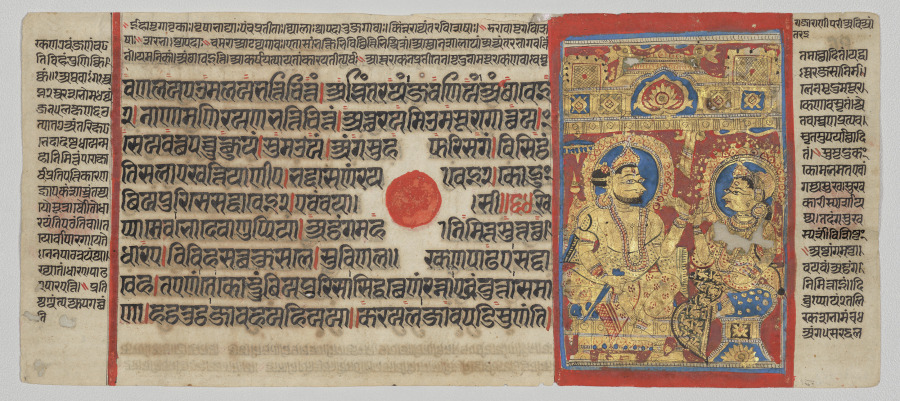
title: King Siddhartha and Queen Trishala Sit Alone to Discuss Her Dreams, Folio 24 (recto), from a Kalpa-sutra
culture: Western India, Gujarat, last quarter of the 15th century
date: c. 1475–1500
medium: Gum tempera, ink, and gold on paper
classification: Painting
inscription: [[upper right]] rājārāṇī parīyaviyāntarai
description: King Siddhartha is depicted on this page with his wife, Trishala, who had a series of auspicious dreams associated with her pregnancy. Her child Mahavira would grow up to become the historical founder of the Jain religion in the 500s BC. The royal couple is resplendently enthroned and bedecked in jewelry. Queen Trishala’s bodice was painted with a green pigment made from copper and vinegar; its high acid content caused the paper itself to disintegrate. The lavish use of gold and lapis lazuli indicates that it was a costly production.